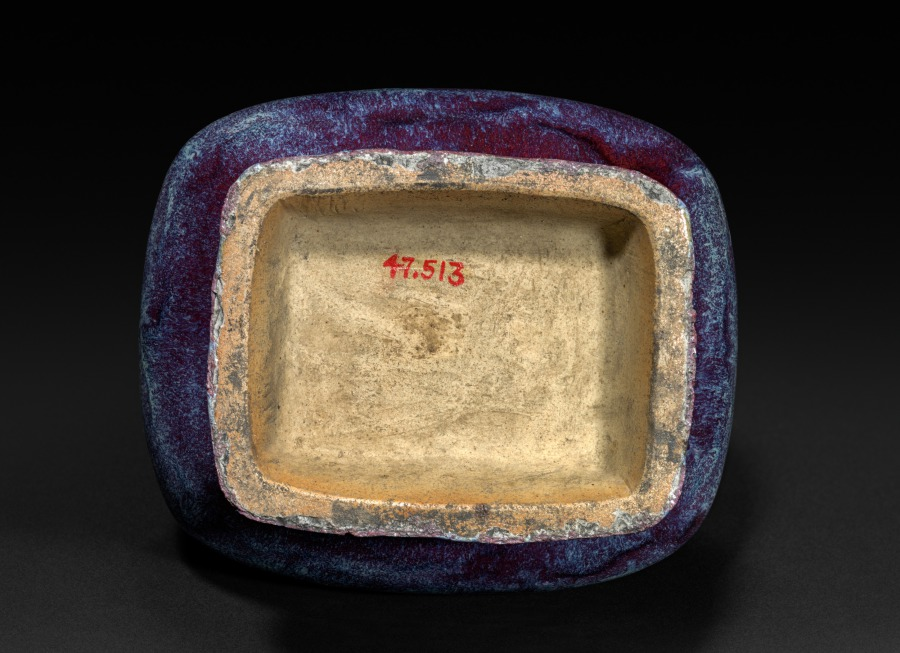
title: Flambé Vase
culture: China, Qing dynasty (1644–1911)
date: 1644–1911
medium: porcelain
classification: Ceramic